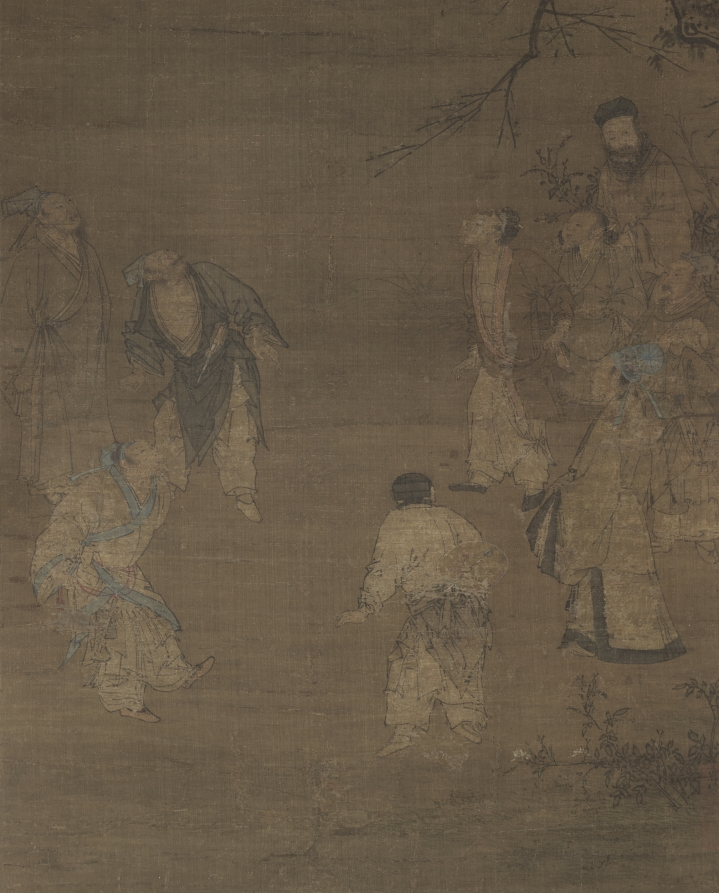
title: The Football Players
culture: China, Southern Song dynasty (1127-1279)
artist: attributed to Ma Yuan (Chinese, c. 1150–after 1255)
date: c. late 1100s–1st quarter 1200s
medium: Hanging scroll; ink and light color on silk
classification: Painting